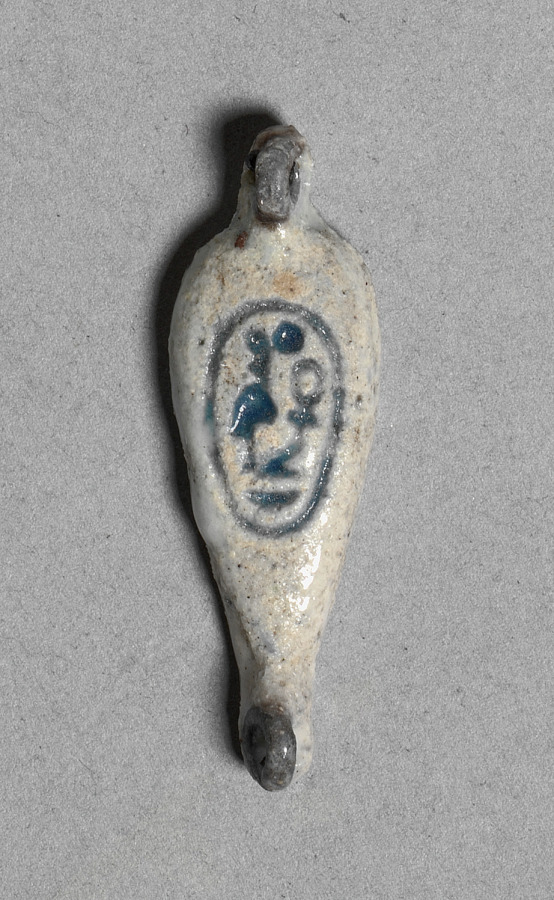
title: Petal-Shaped Bead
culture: Egypt, New Kingdom (1540–1069 BCE), Dynasty 18, reign of Amenhotep III (1390–1352 BCE)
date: c. 1391–1353 BCE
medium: faience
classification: Jewelry